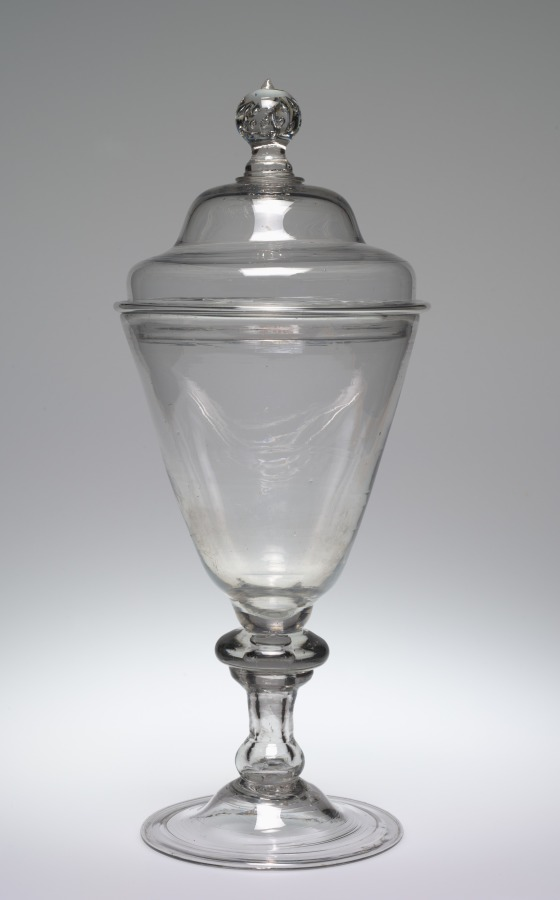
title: Flip Cup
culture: America, early 19th century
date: c. 1800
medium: glass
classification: Glass